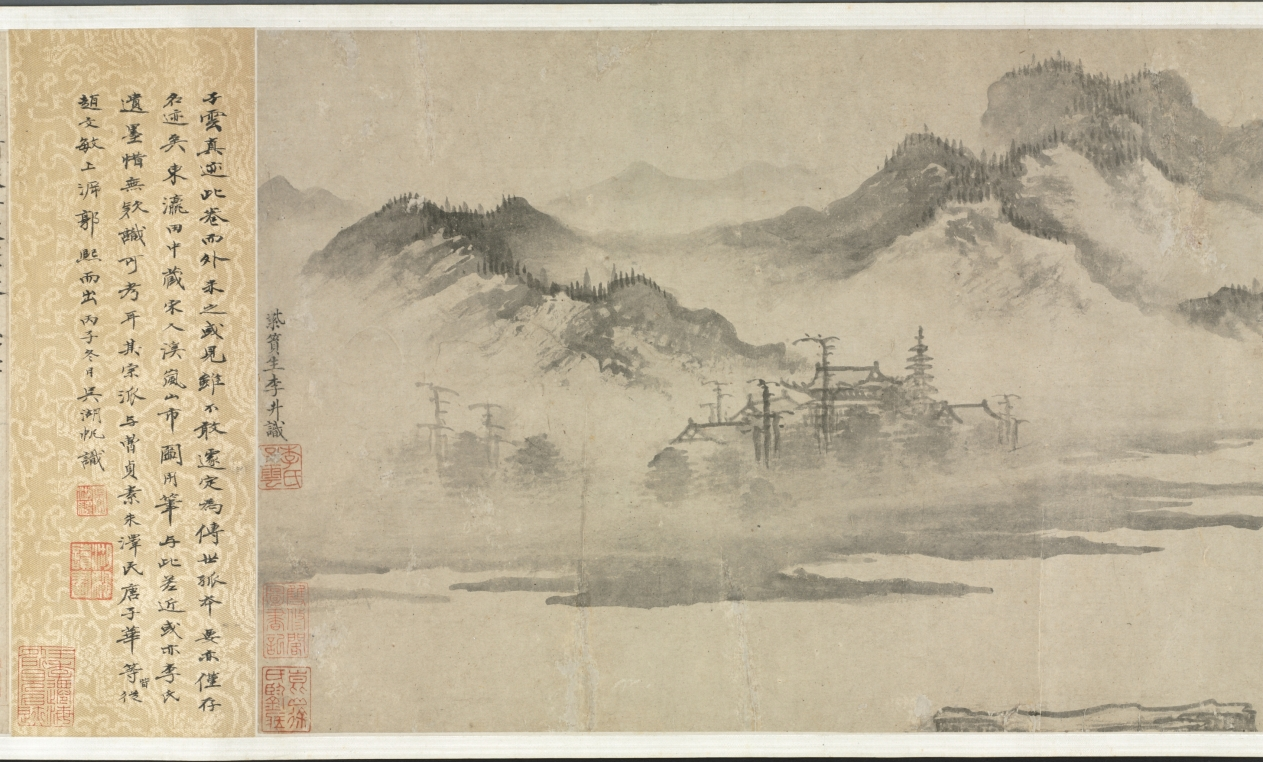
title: Buddha's Conversion of Five Bhiksu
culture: China, Yuan dynasty (1271–1368)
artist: Li Sheng (Chinese, active c. 1324–after 1375)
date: mid-1300s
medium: handscroll; ink on paper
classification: Painting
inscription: 紫篔生李升識 [印] 李氏子雲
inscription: 4 colophons and 12 additional seals: The "Heart" Sutra (Maha Prajnaparamita) text written by Wu Yuqing 吳餘慶 (active early 1400s); 2 seals of Xu Qianxue 徐乾學 (1631–1694); 3 colophons, one dated 1929 and two dated 1936, and 9 seals of Wu Hufan 吳湖帆 (1894–1968); 1 colophon, dated 1932, of Chen Dingshan; 1 seal unidentified.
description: This episode stems from the life of the historical Buddha, who, after his enlightenment, was initially hesitant about preaching his own doctrine. After much personal deliberation and prodding by deities, he finally relented. The first converts were the five guards who served him when he was still a prince. For Li Sheng, this is the pretext of the painting, which moves from the interaction of the bhiksu with the Buddha to a broader awareness of the vast surroundings of the scene.